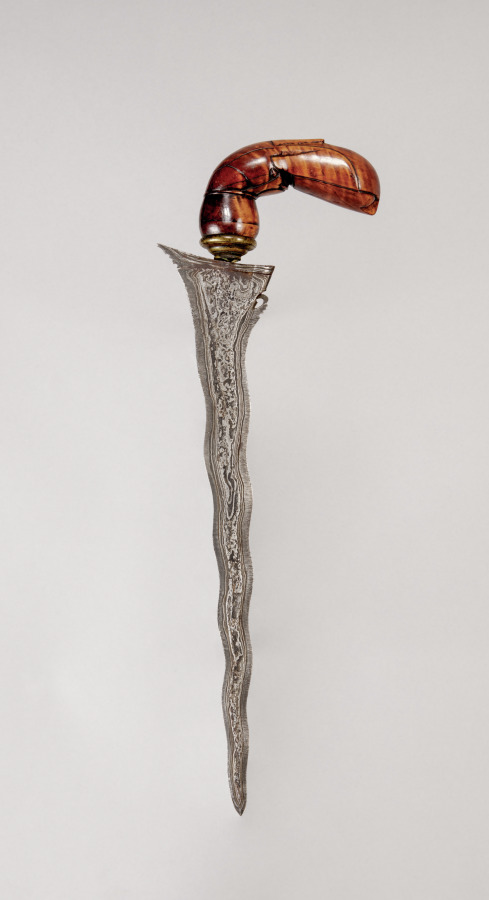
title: Sword (Kris)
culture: Java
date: 1800s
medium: iron with wooden handle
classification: Arms and Armor